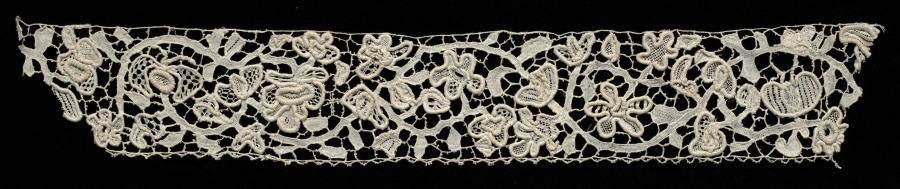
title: Lace Edging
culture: Italy, Venice, 1700s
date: 1700s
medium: Linen: needle lace (Venetian Raised Point)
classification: Lace